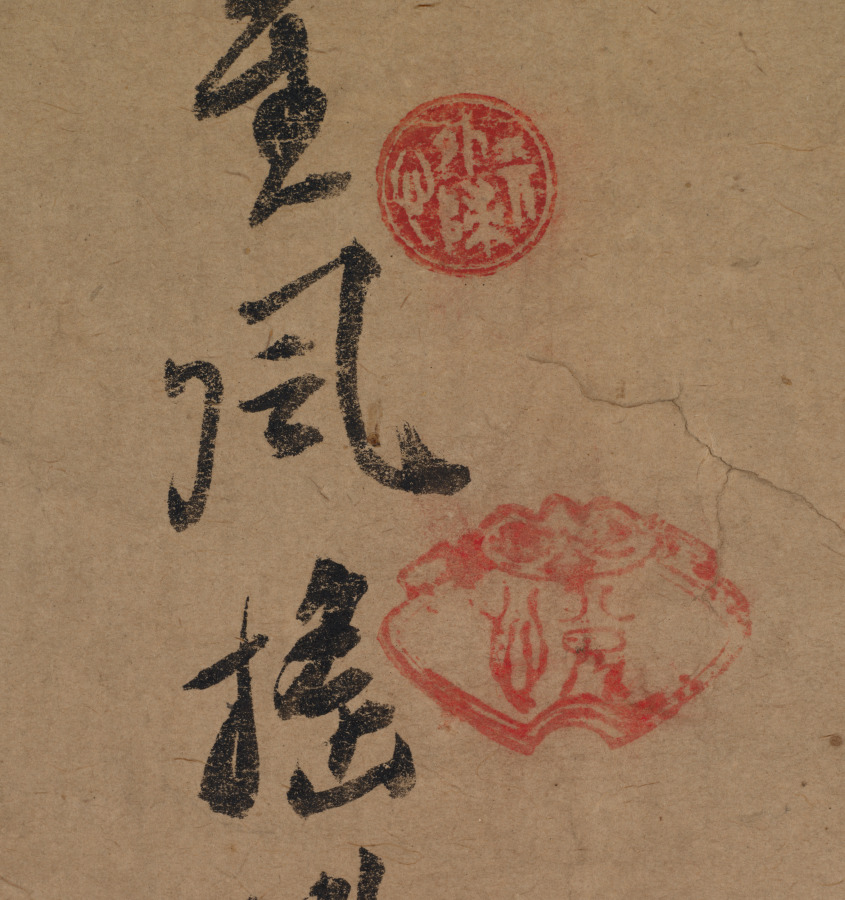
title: Grapevine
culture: China, Qing dynasty (1644–1911)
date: 1700s–1800s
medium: hanging scroll; ink on paper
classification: Painting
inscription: Two-line calligraphic inscription with signature. 5 unidentified seals.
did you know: Clusters of grapes can represent both abundant wealth and numerous offspring.